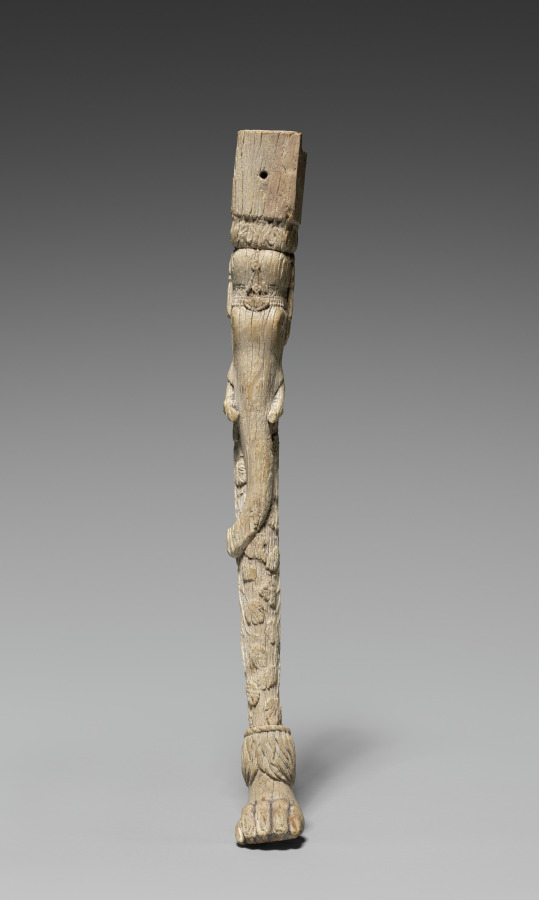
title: Chair Leg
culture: Afghanistan, Begram, Kushan period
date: 300s CE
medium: ivory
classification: Ivory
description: This ivory carving was made to sheath wooden furniture made in India for trade along the Silk Road, which stretched from Rome to China. Indian ivory-faced furnishings--along with lacquer boxes from China and painted glass from Rome--were found in an extraordinary deposit of luxury goods at a site called Begram. The wood on which the ivory and lacquer were affixed has long disintegrated, and only the small pieces remain.